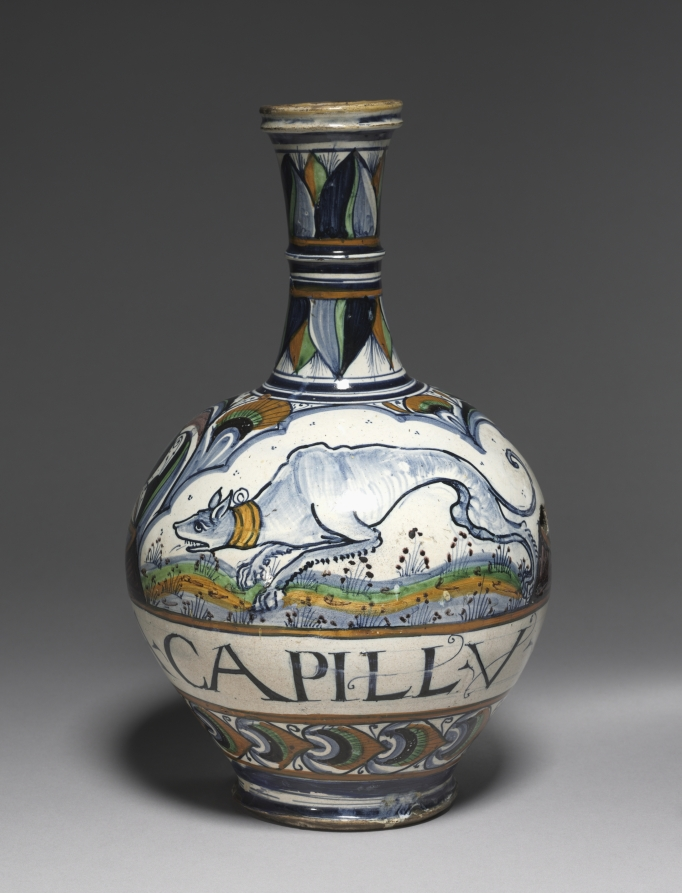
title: Pharmacy Bottle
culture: Italy, Papal States, Faenza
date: c. 1500–1510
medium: tin-glazed earthenware (maiolica)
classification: Ceramic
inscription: written in lower ribbon band: A. CAPILLV.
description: Pharmacy bottles that lined the shelves of Renaissance pharmacies often held medicinal herbs, spices, and ointments. The inscription on this bottle reads CAPILLV, which was a liquid extracted from a fern-like plant commonly referred to as “maiden’s hair water.”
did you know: The peacock feather design lining the bottom of this bottle was especially popular in Faenza, near Bologna, during the Renaissance.